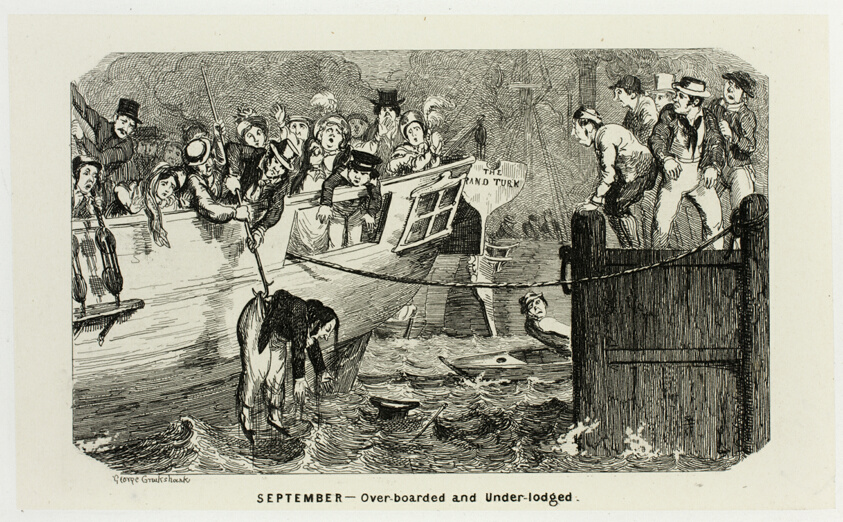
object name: Print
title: September - Over-Boarded and Under-Lodged from George Cruikshank's Steel Etchings to The Comic Almanacks: 1835-1853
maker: George Cruikshank (English, 1792-1878); published by Pickering & Chatto (English, 19th century)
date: 1840, printed c. 1880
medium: Steel etching in black on cream India paper, laid down on off-white card (chine collé)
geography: England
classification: etching; paper; steel; print; prints and drawing